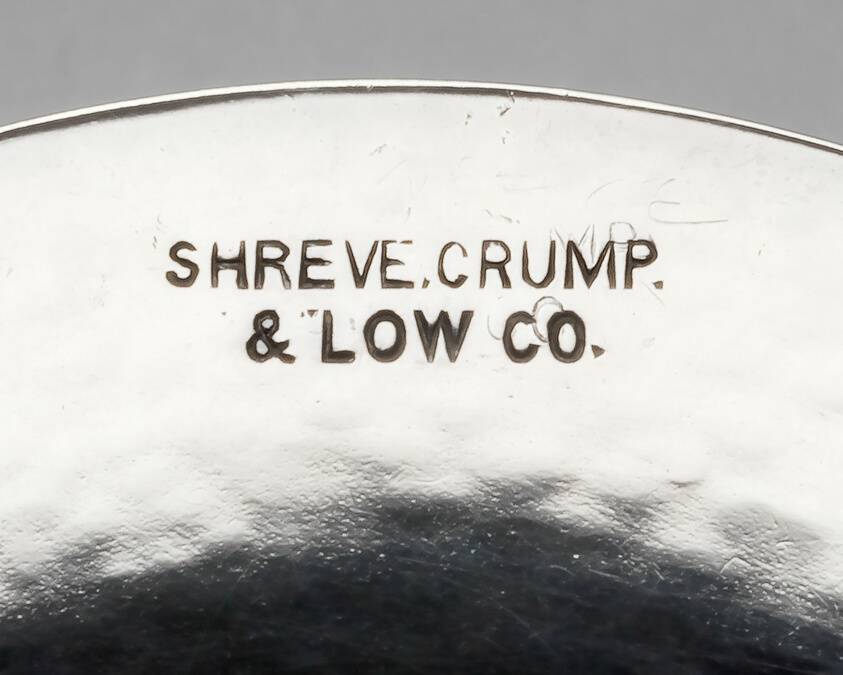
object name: Metalwork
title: Two-Handled Dish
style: Arts and Crafts Movement, American Arts and Crafts Movement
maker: Shreve, Crump and Low (American, founded 1869); Boston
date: 1902–7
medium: Silver and turquoise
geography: Boston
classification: dish (vessel); silver; american decorative arts; american arts; decorative arts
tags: dining, drinking